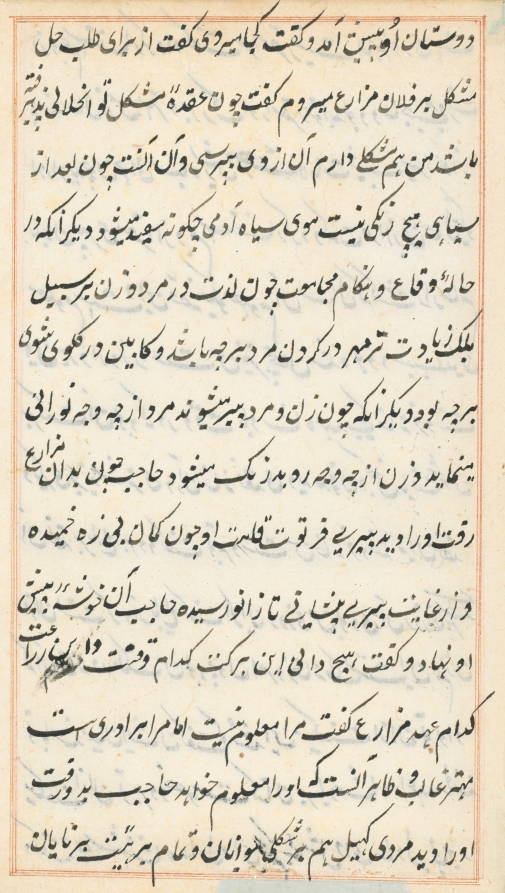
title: Page from Tales of a Parrot (Tuti-nama): text page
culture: Mughal India, court of Akbar (reigned 1556–1605)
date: c. 1560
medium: gum tempera, ink, and gold on paper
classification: Painting